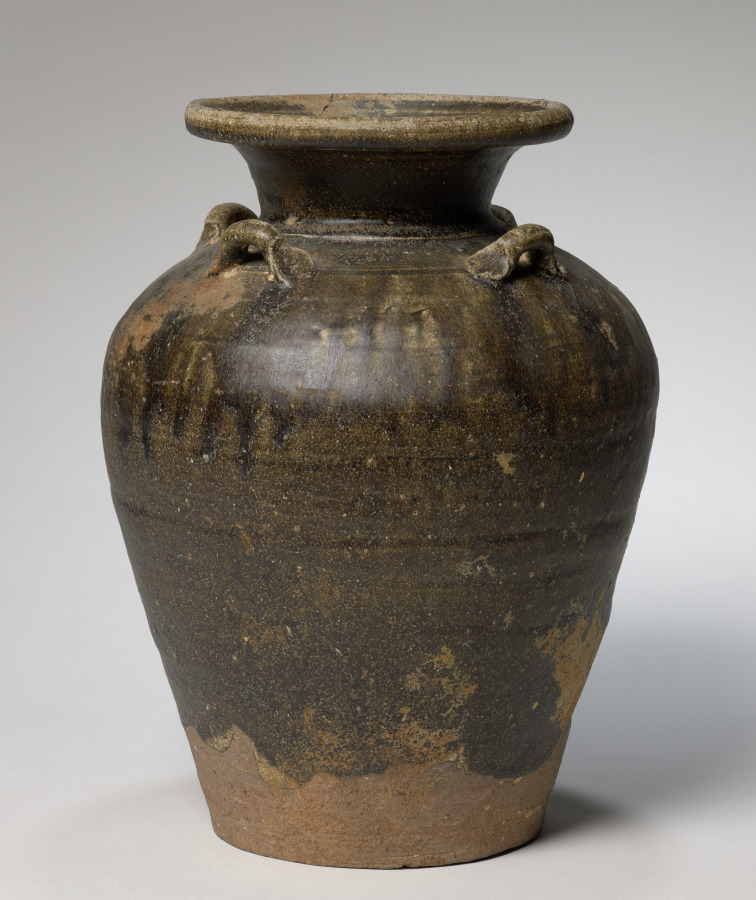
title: Storage Jar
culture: Thailand, Sawankhalok, 14th century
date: 1300s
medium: stoneware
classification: Ceramic